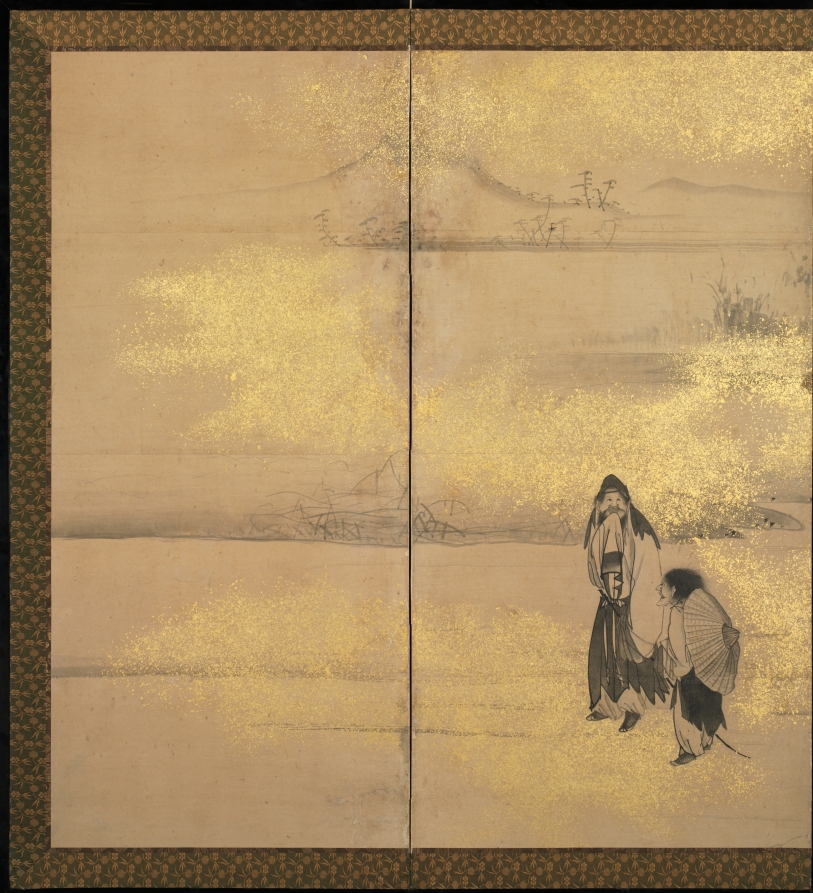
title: The Eight Immortals of the Wine Cup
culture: Japan, Edo period (1615–1868)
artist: Soga Shōhaku (Japanese, 1730–1781)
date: later 1700s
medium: Six-panel folding screen, ink and cut-gold foil on paper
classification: Painting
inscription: signature, lower right corner.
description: Responding to the desires of the middle class (chonin), some Japanese painters of the late Edo period moved away from the seriousness associated with the Chinese theme of reclusion, focusing instead on the motif’s humorous aspects. The theme Eight Immortals of the Wine Cup is based on a poem by the renowned 8th-century Chinese poet Du Fu about his eight colleagues. These scholars eagerly sought release from their official governmental duties and then supposedly fled the capital for the countryside. There, they engaged in wildly eccentric behavior and adventurous creative work, all fueled by copious amounts of wine. Shohaku’s version of events exaggerates the scholars’ pleasure, as seen in their comical facial expressions.